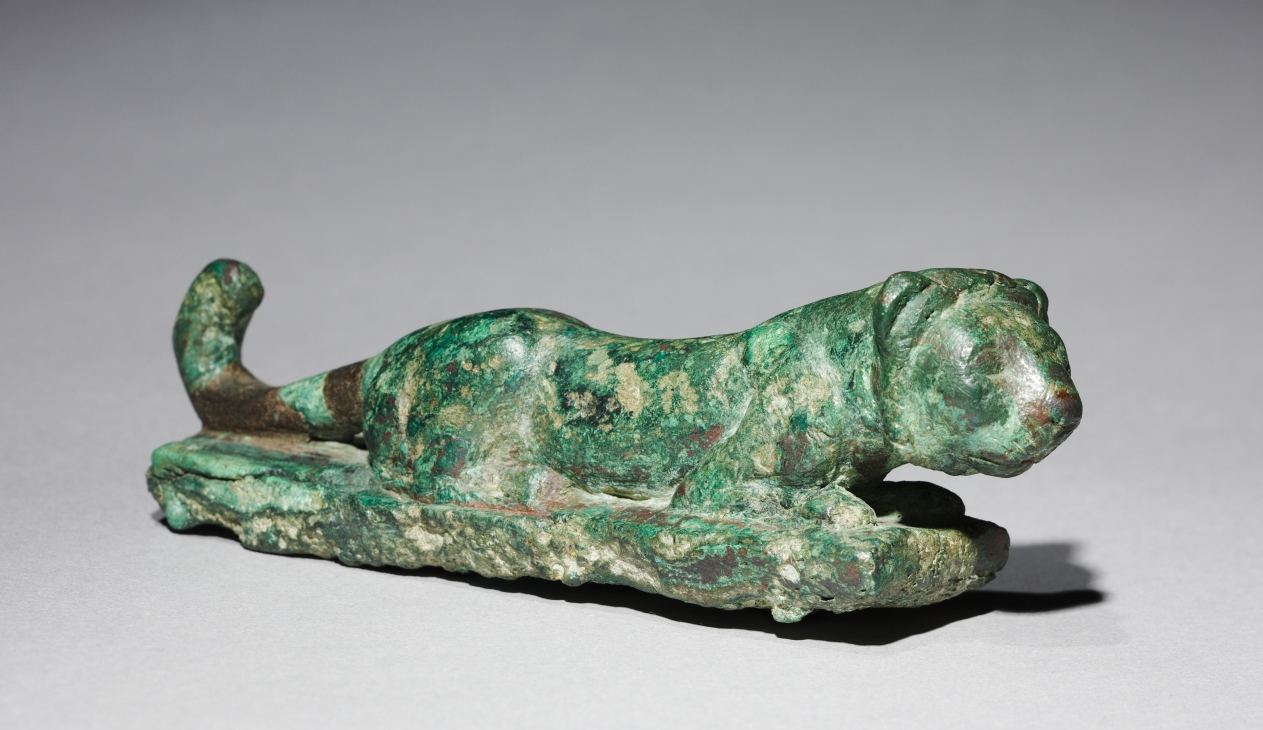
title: Lioness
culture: Sumerian, Iraq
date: c. 2100 BCE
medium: copper alloy, lost-wax cast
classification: Sculpture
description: Crouched in the stance of a hunter stalking its prey, this diminutive lioness possesses the latent power of a predator about to strike. In the ancient Near East, the ferocity and strength of lions was often associated with rulers and gods through symbolic imagery.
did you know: The fierce and powerful nature of lions was often associated with rulers through symbolic imagery.